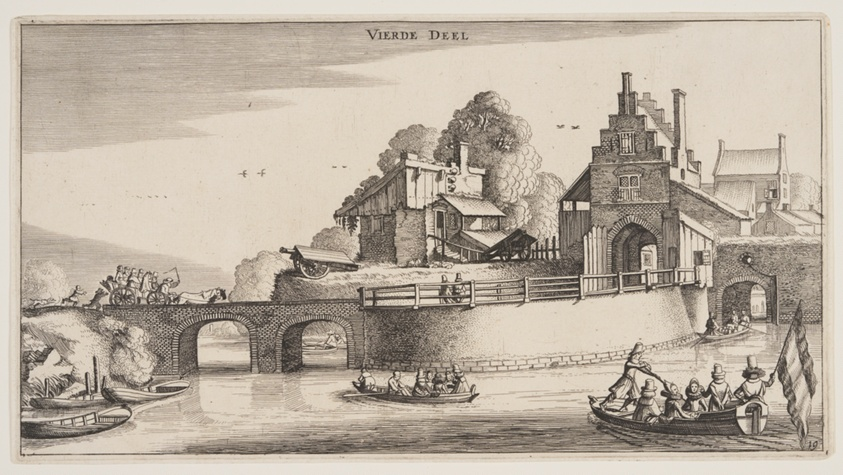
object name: Print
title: Entrance of a Town, from Landscapes (Playsante Lantschappen)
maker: Attributed to Claes Jansz. Visscher II (Dutch, 1586-1652); after Jan van de Velde II (Dutch, c. 1593-1641)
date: c. 1641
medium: Etching, with engraving, on ivory laid paper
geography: Netherlands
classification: etching; paper; print; prints and drawing